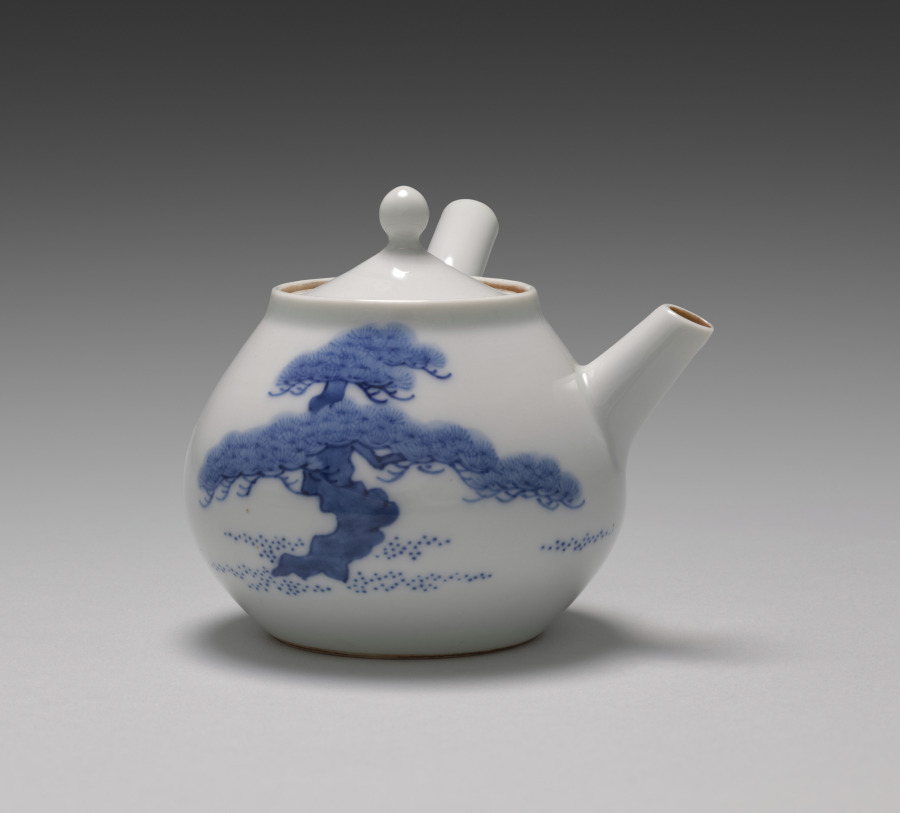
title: Teapot with Pines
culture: Japan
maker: Seifū Yohei III (Japanese, 1851–1914)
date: 1893–1914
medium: Porcelain with underglaze blue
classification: Ceramic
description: Side-handled teapots known as kyūsu and hot water coolers, or yuzamashi, are essential components of sencha tea sets. The teapot is, of course, meant for steeping and serving the tea. Yuzamashi are used to cool boiled water to the ideal temperature for the type of tea to be brewed. This teapot has a pine in underglaze blue on each side. The tip of one of these pines reaches onto the tiny lid, and as with the trees on the Water Cooler with Pines, CMA 2022.163, the trunks are curvy ribbons with little definition. Considering the execution of the two vessels' designs, one might imagine the pot and cooler to have been part of the same set.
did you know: This teapot with images of pines are among Seifū Yohei III’s designs painted in blue.